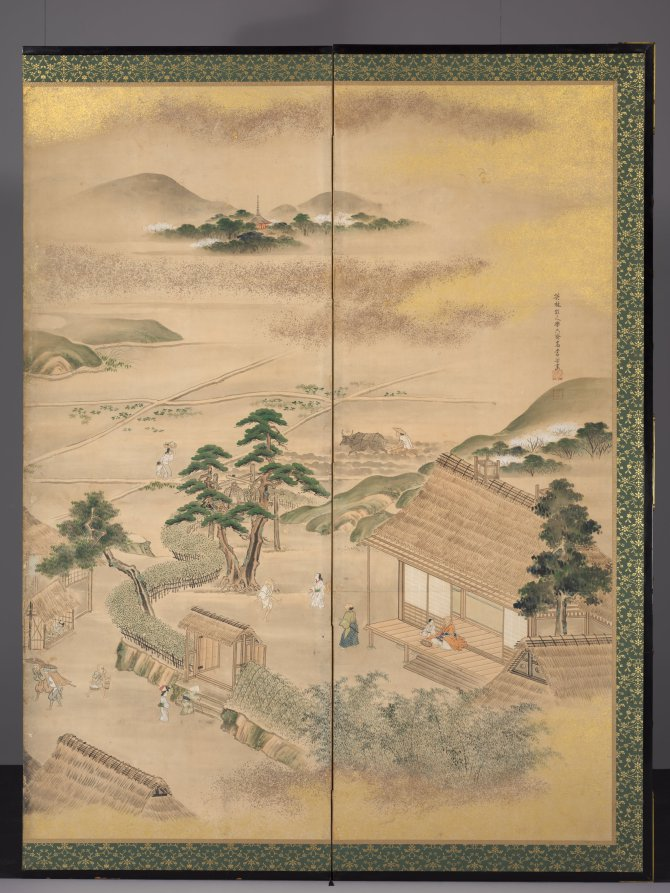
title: Spring and Autumn Farming (Spring)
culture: Japan, Edo period (1615–1868)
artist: Kō Sūkoku (Japanese, 1730–1804)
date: 1700s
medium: Six-panel folding screen, ink, light color, gold, and silver on paper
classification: Painting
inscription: Signature of the artist: "Enrin san jin Rakushisai ko Sukoku ga" (each screen)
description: These screens present the cycle of the farming year, starting with spring at right and ending with fall at left. Close examination of these screens reveals moments of games and amusement, the enjoyment of meals as well as intellectual and spiritual pursuits interspersed among the scenes of cultivating and preparing the rice harvest. The artist Kō Sūkoku is considered the 18th-century heir in style and attitude to Hanabusa Itchō (1652–1724). Itchō’s work incorporated elements from Kano school, ukiyo-e, and literati styles of painting. Kō trained with one of Hanabusa’s pupils, Sawaki Sūshi, who was best known for scenes depicting everyday life and customs.